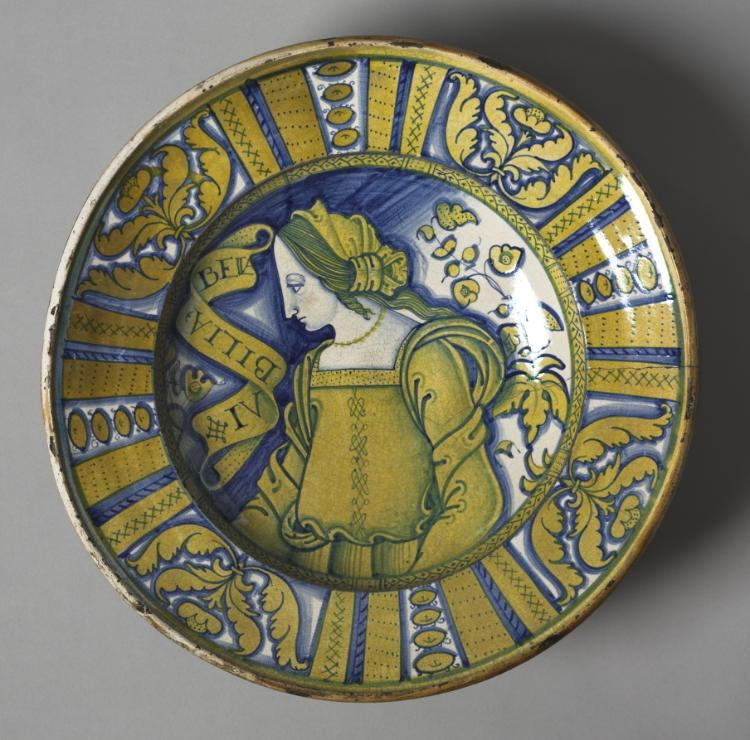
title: Bella Donna Charger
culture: Italy, Papal States, Deruta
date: c. 1520–30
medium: tin-glazed earthenware with yellow and blue lustre (maiolica)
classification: Ceramic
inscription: with inscription: IV BLLIA BELLA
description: Ceremonial plates decorated with a bella donna (beautiful woman) feature half-length portraits of a young woman surrounded by scrolled banners. Many bella donna plates were informed by the frescos of Renaissance painters Pietro Perugino and Pinturicchio.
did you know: Scholars believe that chargers such as these were given as marriage gifts or in memory of someone who had died.